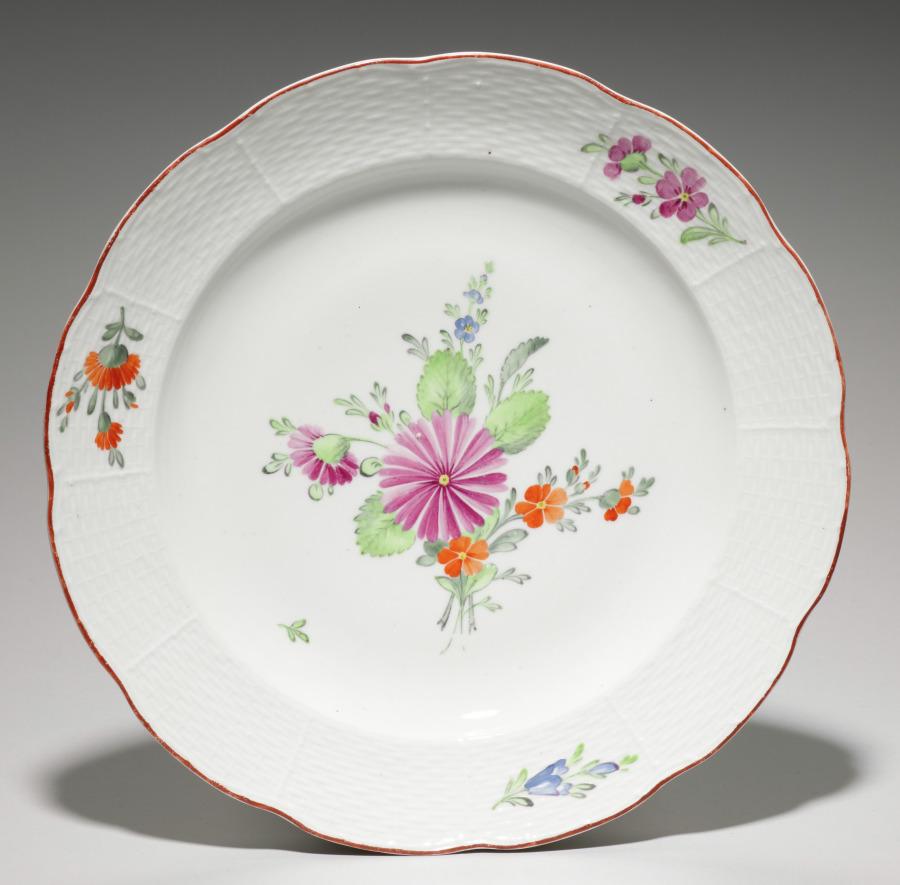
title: Plate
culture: Russia, St. Petersburg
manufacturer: St. Petersburg Imperial Porcelain Factory (Russian)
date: 1762–1796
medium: porcelain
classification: Ceramic